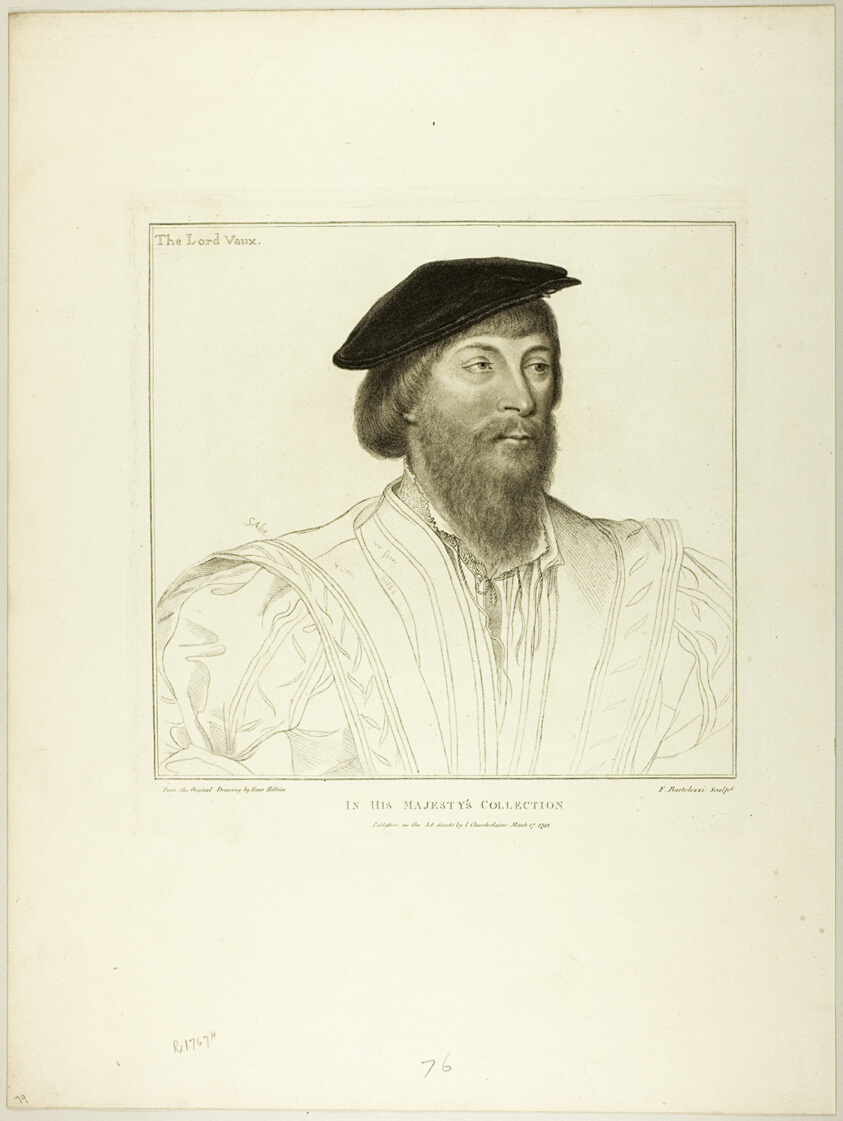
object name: Print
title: Lord Vaux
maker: Francesco Bartolozzi (Italian, 1727-1815); after Hans Holbein the younger (German, 1497-1543)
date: March 17, 1792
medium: Stipple engraving on ivory laid paper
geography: Italy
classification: engraving; print; prints and drawing